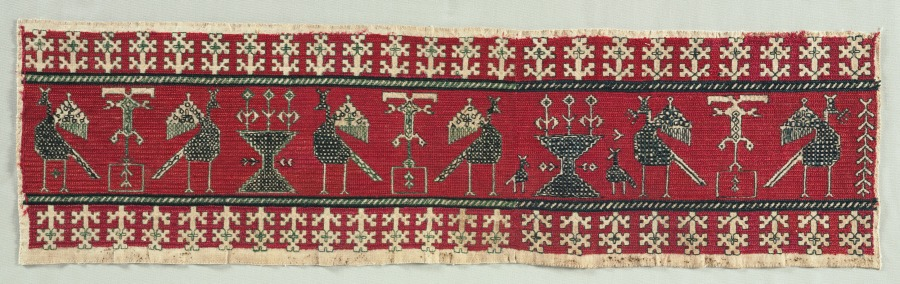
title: Five fragments of a furnishing textile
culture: Africa, North Africa, Morocco, Azemmour, Moroccan embroiderer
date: 1700s–1800s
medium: Linen, silk, dye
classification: Embroidery